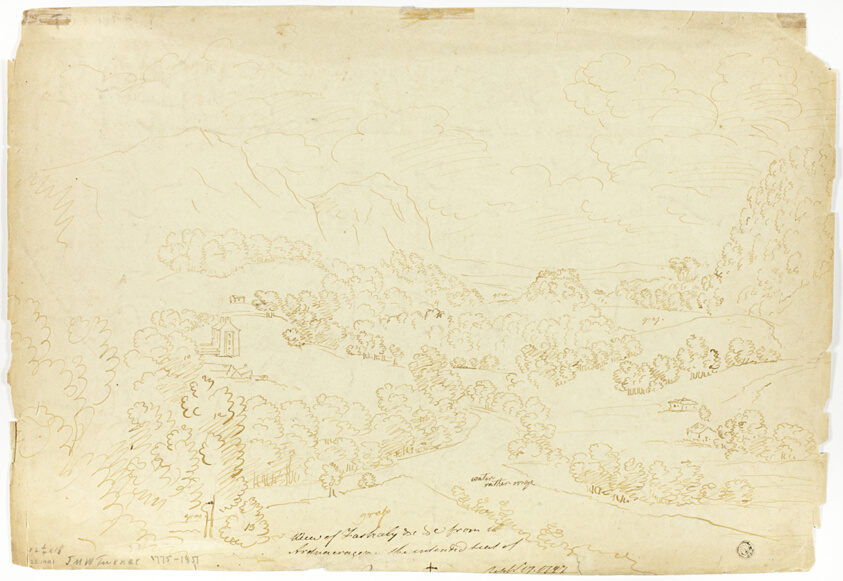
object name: Drawing and Watercolor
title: The Fall of the River Tumble (recto); View of Fastraly (verso)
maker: Attributed to Joseph Mallord William Turner; English, 1775-1851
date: 1797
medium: Pen and brown ink, over graphite (recto and verso), on cream wove paper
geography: England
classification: pen and ink drawings; paper; drawings (visual works); prints and drawing